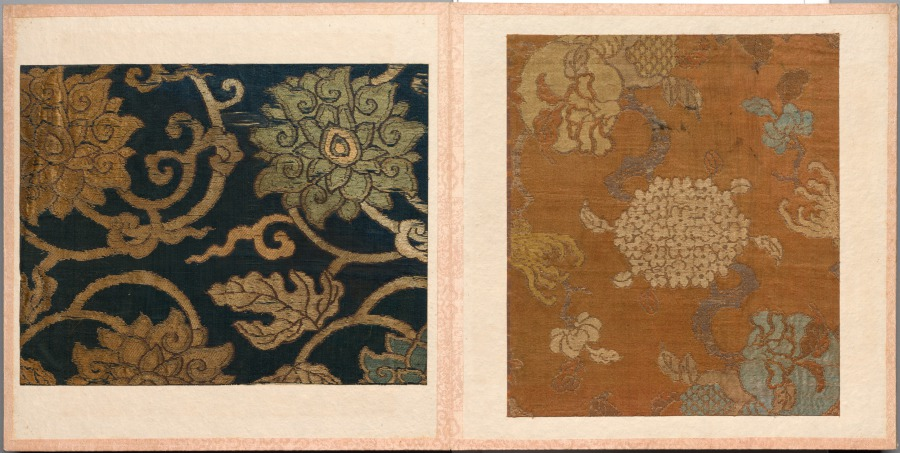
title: Album of Textile Samples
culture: Japan and China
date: 1700s–1800s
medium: silk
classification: Textile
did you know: This album contains 46 pages with 156 mounted Chinese or Japanese textile samples.